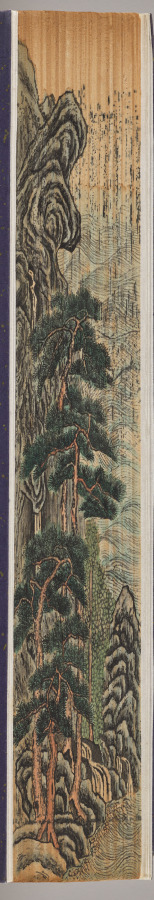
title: Yu-hai (The Ocean of Jade)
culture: China, Ming dynasty (1368–1644)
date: 1368–1644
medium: woodblock-printed book with painted edges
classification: Bound Volume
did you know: When each book is rolled to form a cylinder, a landscape appears on the edges, painted in ink and washes of color.